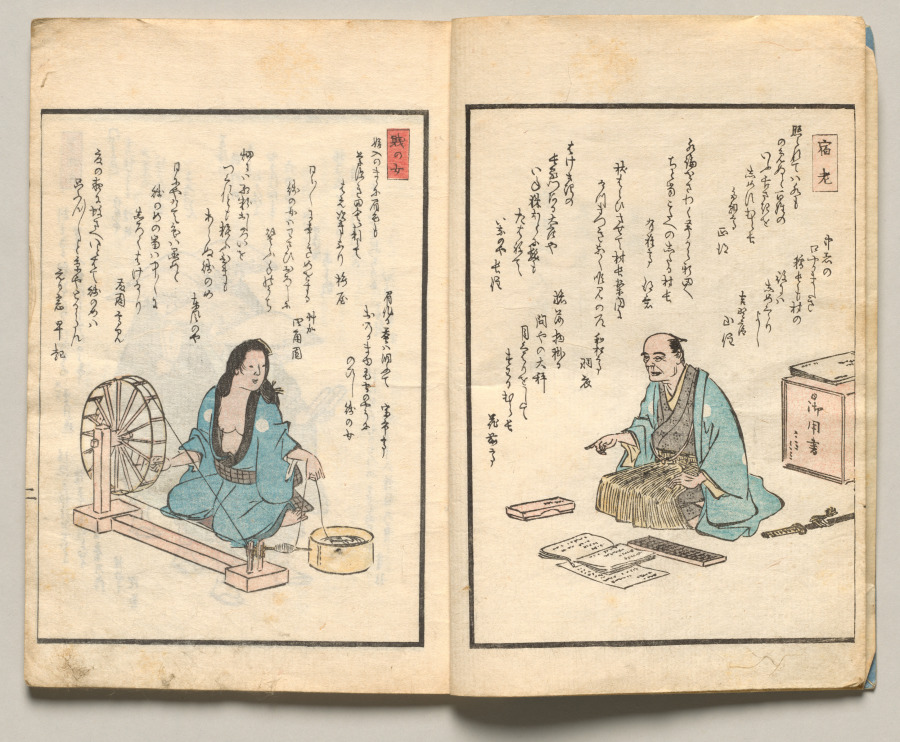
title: Spread Two from Volume Three of People of Japan in Light Verse (Kyōka)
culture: Japan, Edo period (1615–1868)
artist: Utagawa Hiroshige (Japanese, 1797–1858)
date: 1857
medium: Woodblock-printed book; ink and color on paper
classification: Bound Volume